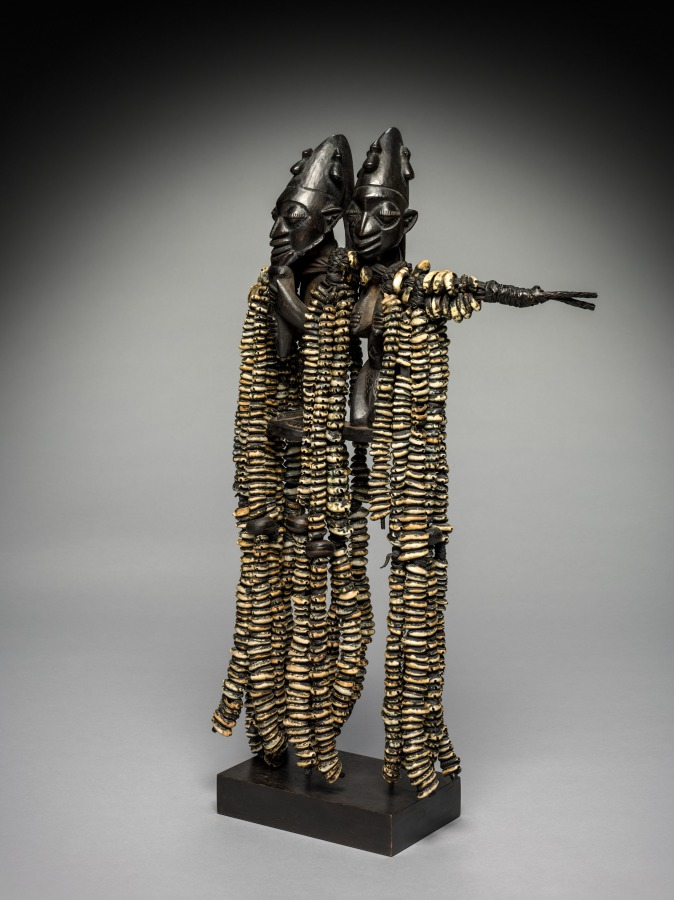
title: Dance staff for Èṣù (Ògò Èlẹ́gba)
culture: Africa, West Africa, Nigeria, Yorùbá-style maker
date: 1800s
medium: Wood, leather, cowrie shells, seeds, and natural fiber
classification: Sculpture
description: Èṣù (also called Èḷégba) embodies the most complex deity in the Yorùbá pantheon of gods. The messenger of the Yorùbá gods, Èṣù is also the bearer of sacrifices, guardian of the ritual way of life, and is associated with highly significant places including crossroads, markets, and home entrances. As seen here, Èṣù's power is often visually represented in Ògò Èḷégba (dance staffs); in this example, the unusually paired man and woman reference his ability to switch between the two genders, turn death into life (through childbirth), and to overcome the tension between the sexes. The male character bears a ritual flute reserved for this god. The abundance of cowrie shells means that Èṣù brings wealth.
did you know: If Eshu isn’t properly honored, trouble may befall the community or individual.